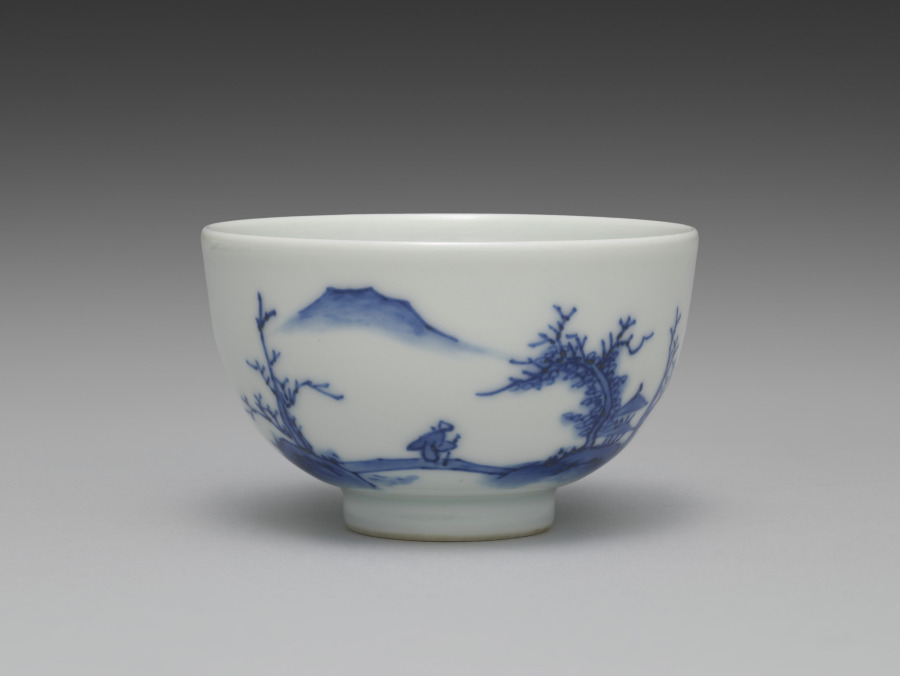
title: Teacup from Tea Set with Chinese Landscape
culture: Japan, Meiji period (1868–1912)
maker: Seifū Yohei III (Japanese, 1851–1914)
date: 1893–1914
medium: Porcelain with underglaze blue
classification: Ceramic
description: This tea set has a side-handled pot called a kyūsu, used for steeping, straining, and serving tea. Unlike some others, this set also has a yuzamashi, a container used to cool boiled water to just the right temperature for the best flavor when steeping. Seifū Yohei III’s painting teacher, Tanomura Chokunyū (1814–1907), made a visual record of famous sencha events that shows how these kinds of porcelains fit with objects such as a stove and kettle to form a complete set of utensils for tea preparation, and with ensembles of decorative objects meant to inspire creativity. The theme of this sencha tea set is the Chinese scholar-recluse in an idyllic landscape. Each of the five teacups has a landscape with an architectural structure and some human activity.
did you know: This cup shows a man in a traveling robe leaning upon his staff as he crosses a bridge to reach a two-story building with a pitched roof, possibly a temple, set between trees. Past this structure, another man sits fishing in a boat.